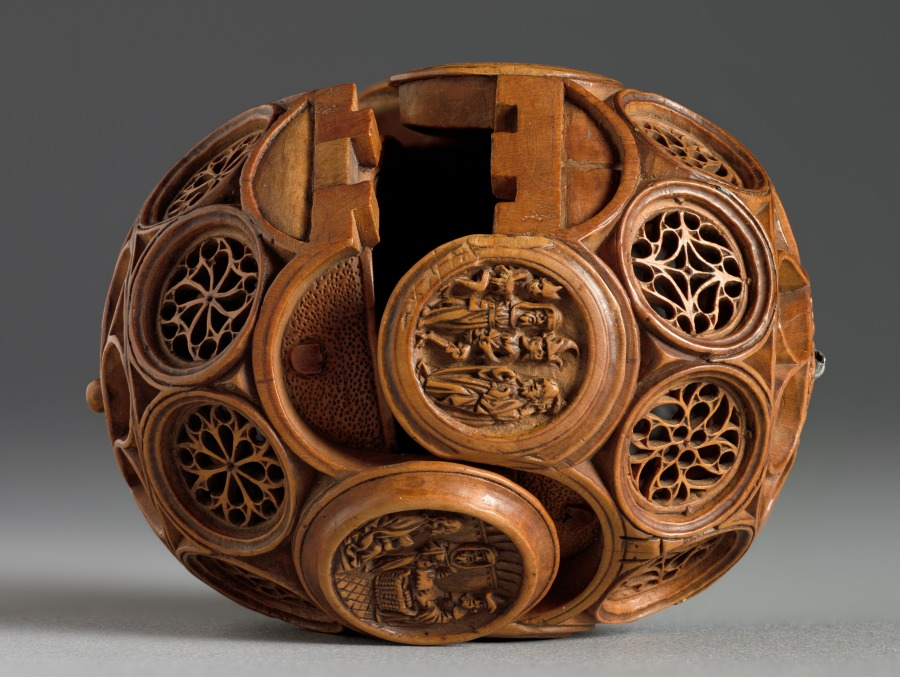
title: Prayer Nut with Scenes from the Life of St. James the Greater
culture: Northern Netherlands (Holland)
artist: Adam Dircksz (Netherlandish, active c. 1500)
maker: and Workshop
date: c. 1500–1530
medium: boxwood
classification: Sculpture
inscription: Interior around lower half: SANCTVS SACRILEGI STAT IVDICIS ANTE TRIBVNAL (Holiness stands before the throne of the profane judge)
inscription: Interior, around upper half: GAVDENS PRO CRISTO IACOBVS SVBDIT CAPVT ENSI (St James submits his head to the sword)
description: Prayer nuts are capsules that can be opened in half and were mainly worn from the end of the 1400s until 1530, particularly in the Netherlands. These objects are generally made from boxwood and carved with extreme refinement and delicacy. They often echo Gothic architecture and include openwork tracery or elaborate decorative patterns. Prayer nuts came into fashion for private devotion as a pendant on the rosary or on a decorative chain. The emergence of prayer nuts went hand in hand with the practice of praying the rosary more frequently at the end of the Middle Ages.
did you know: This miniature masterpiece was held and caressed within the palm of the holder as they prayed and meditated on their faith. What do you use to focus or engage in quiet concentration?